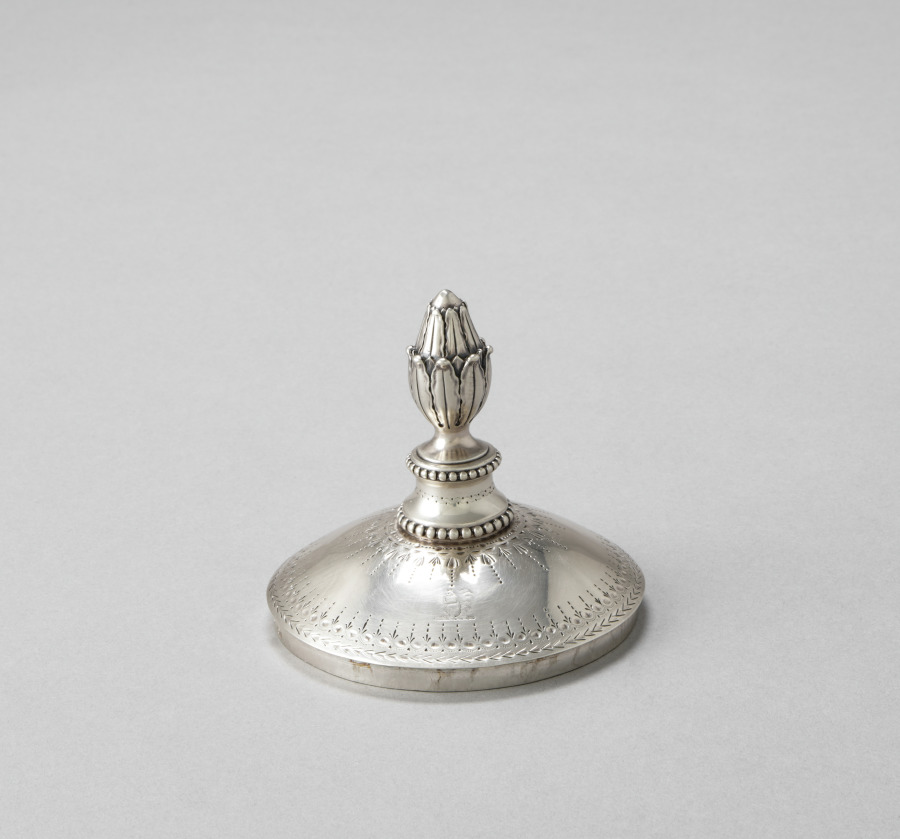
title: Tea Urn (lid)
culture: England, London, 18th century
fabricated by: Henry Greenway (British)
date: 1781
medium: silver and ivory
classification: Silver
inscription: engraved on body: coat of arms-- tower surrounded by three covered cups; crest consisting of a squirrel. Engraved on cover: crest consisting of a squirrel (coat of arms of Amcotts family).